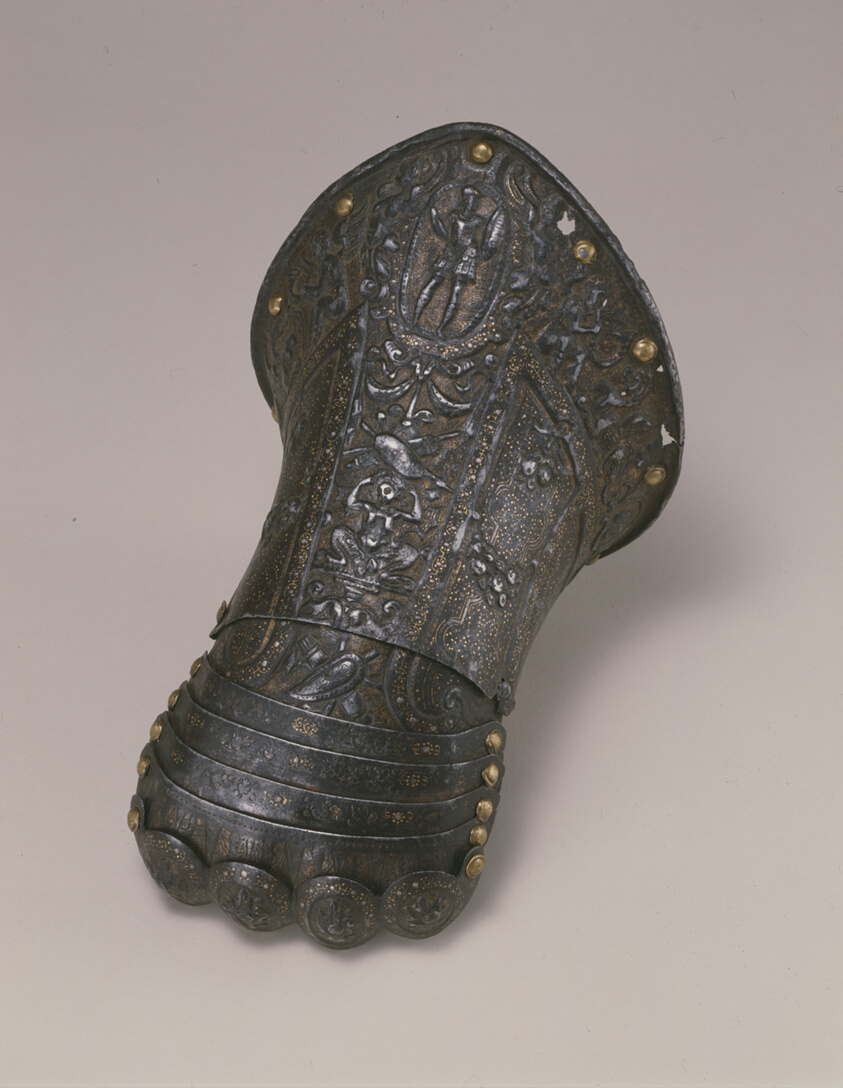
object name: Armor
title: Gauntlet for the Left Hand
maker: Lucio Piccinino (Italian, active 1575-1595); Milan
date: 1575/90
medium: Steel, gold, silver, and brass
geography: Milan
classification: suit-gauntlet; armor; arms and armor